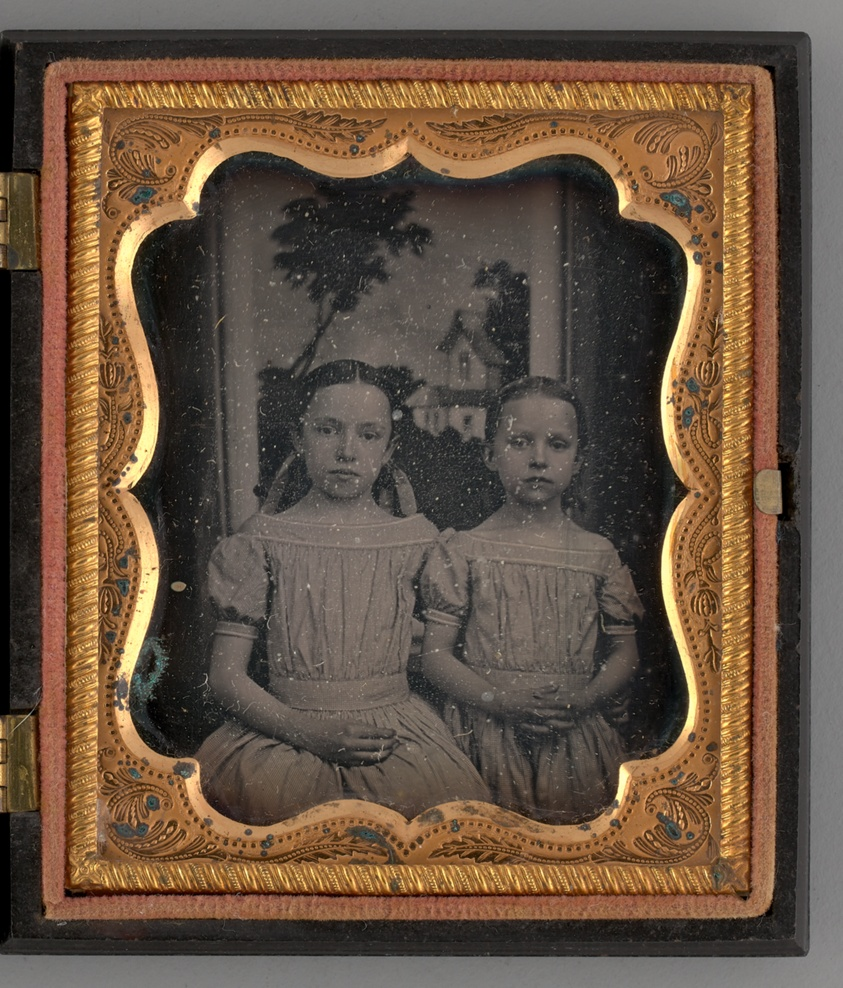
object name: Photograph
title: Untitled (Portrait of Two Girls)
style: 19th century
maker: Unknown maker; American, 19th century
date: 1860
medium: Daguerreotype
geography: United States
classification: portrait; photograph; photographic process; photography; portrait; daguerreotype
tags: lundberg collection, portrait, children, girls, photography, portraits, portraits: child subject, portraits: female subject